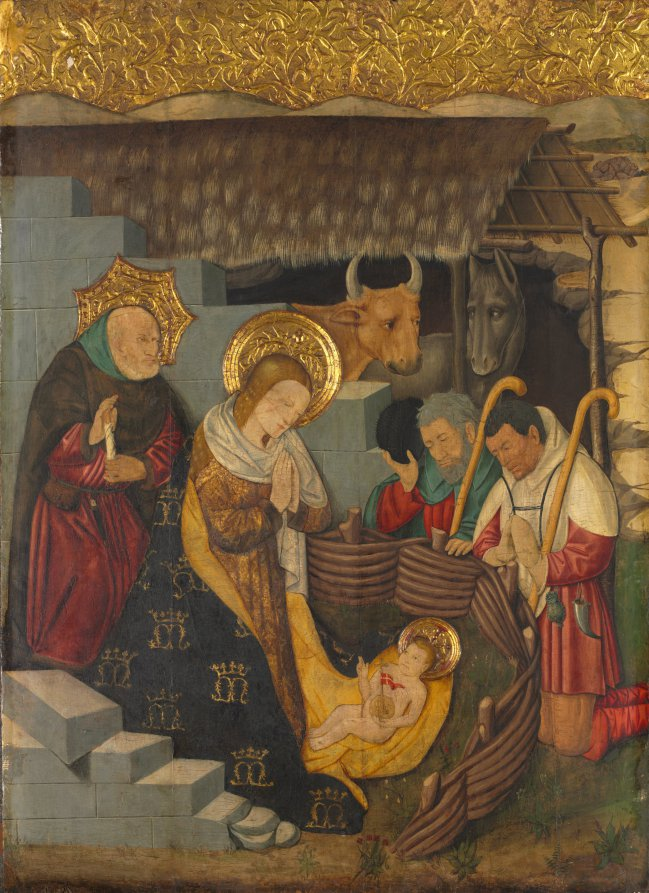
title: The Nativity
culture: Spain, Catalonia, 15th century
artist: Jaume Ferrer the Younger (Spanish, Catalonia died c. 1460/70)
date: c. 1457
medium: oil, tempera, and gold on wood panel (fir)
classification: Painting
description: This painting is believed to be a remaining component of a six-panel altarpiece. The large central panel is now preserved in the Museu National d’Art de Catalunya in Barcelona. Ferrer collaborated with the painter Pere Garcia de Benavarri on this commission. Spanish works like these often feature elaborate treatment of the gold background, evident here in the exuberant raised decoration (called pastiglia) in the haloes. As a symbol of his dominion over the world, Christ holds an orb in his left hand; he bestows a blessing with his right hand. The Virgin kneels above him in rapt adoration. Using the wattle fence almost as a church pew, two shepherds express humble piety; one removes his hat and the other clasps his hands in prayer.